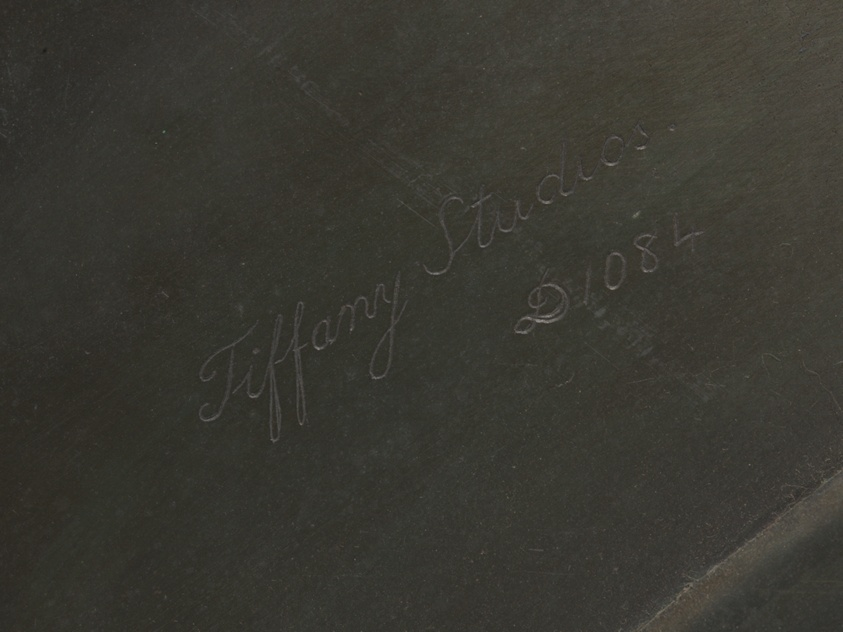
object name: Furnishings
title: Mirror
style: Arts and Crafts Movement, 20th Century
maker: Possibly designed by Clara Pierce Wolcott Driscoll (American, 1861–1944); and/or Joseph Briggs (American, born England, 1873–1937); Tiffany Glass and Decorating Company (American, 1894–1902); or Tiffany Studios (American, 1902–32); Corona, New York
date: c. 1901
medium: Favrile glass, mirrored glass, and bronze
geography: Corona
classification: flat mirrors; american decorative arts; decorative arts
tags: lotus, reflections, swirl motifs